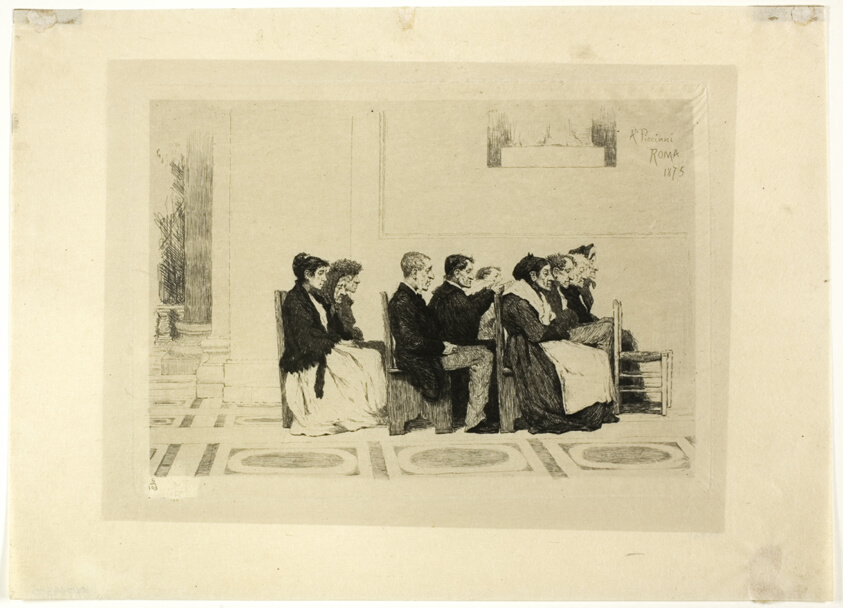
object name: Print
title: Attending Mass, Rome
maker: Antonio Piccinni (Italian, 1846-1920)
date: 1875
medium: Etching in black, with gray plate tone, on paper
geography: Italy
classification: etching; print; prints and drawing